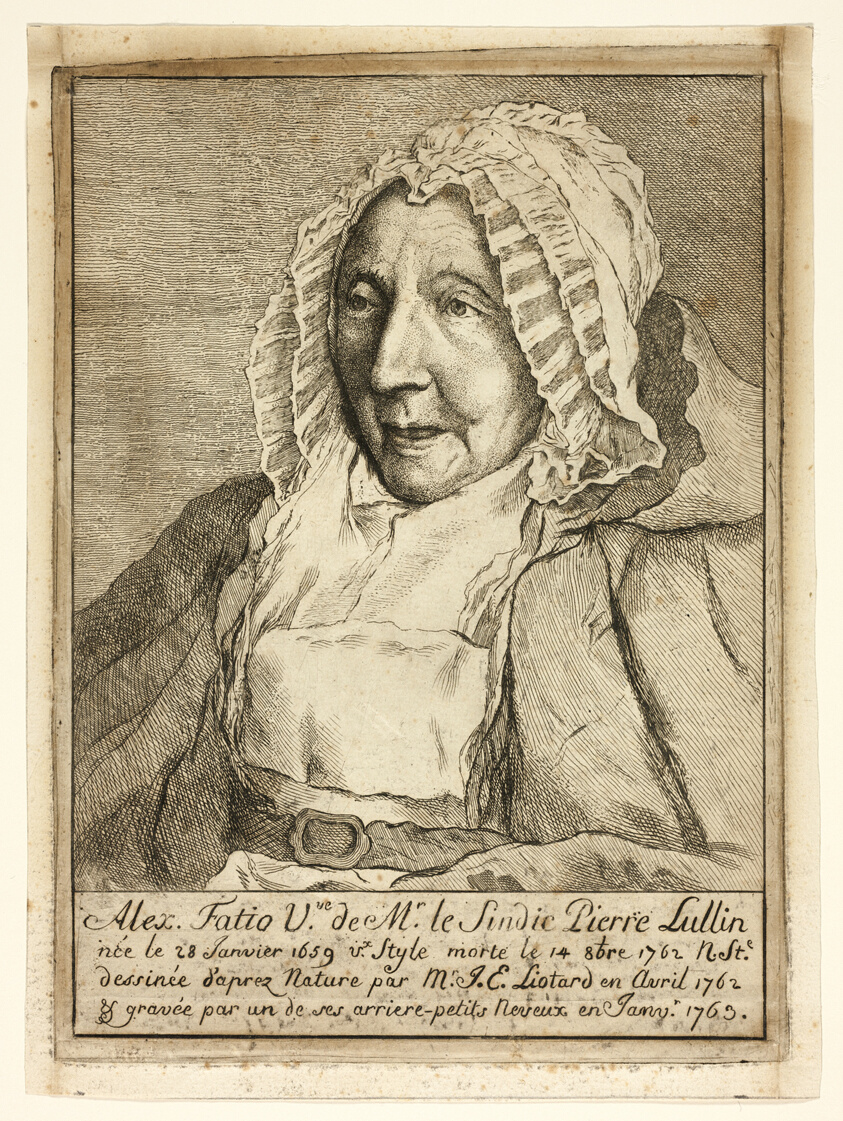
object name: Print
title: Madame Pierre Lullin-Fatio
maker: Possibly François Jalabert or Jallabert; after Jean-Étienne Liotard (Swiss, 1702-1795)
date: 1763, after a drawing dated April 1762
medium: Etching and engraving in black on buff laid paper (discolored to tan), tipped onto ivory wove paper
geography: Switzerland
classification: etching; paper; print; prints and drawing